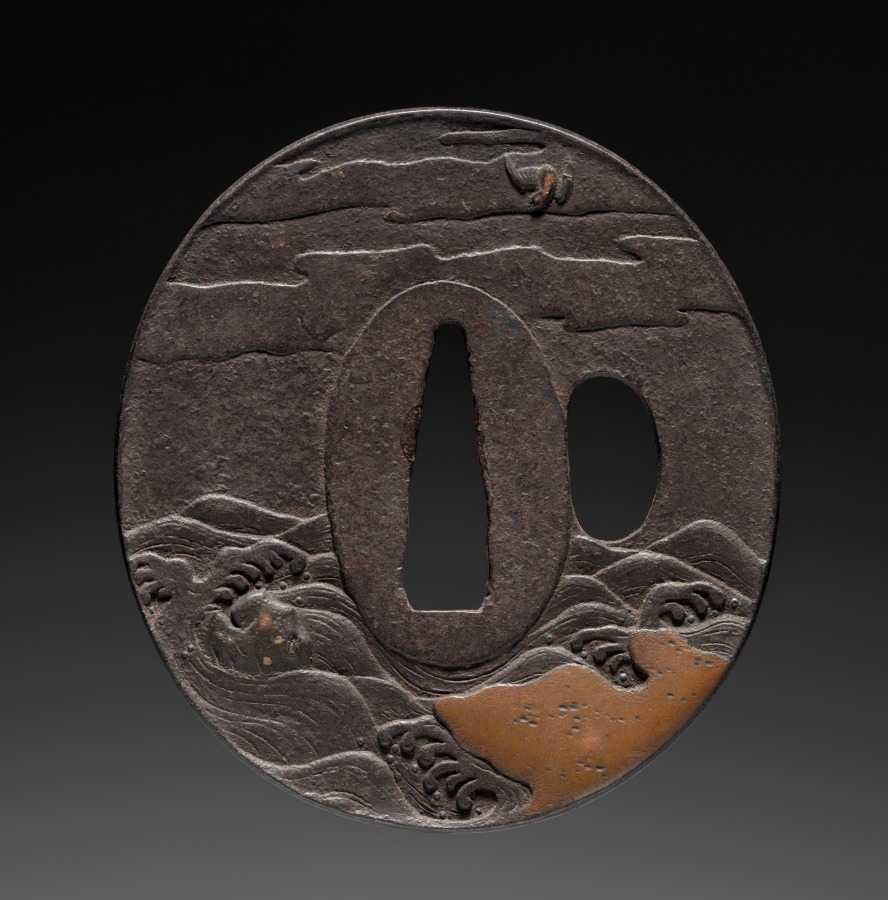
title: Sword Guard (Tsuba) with Plovers in Waves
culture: Japan, possibly Edo period (1615-1868)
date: c. 1615–1868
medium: iron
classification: Arms and Armor